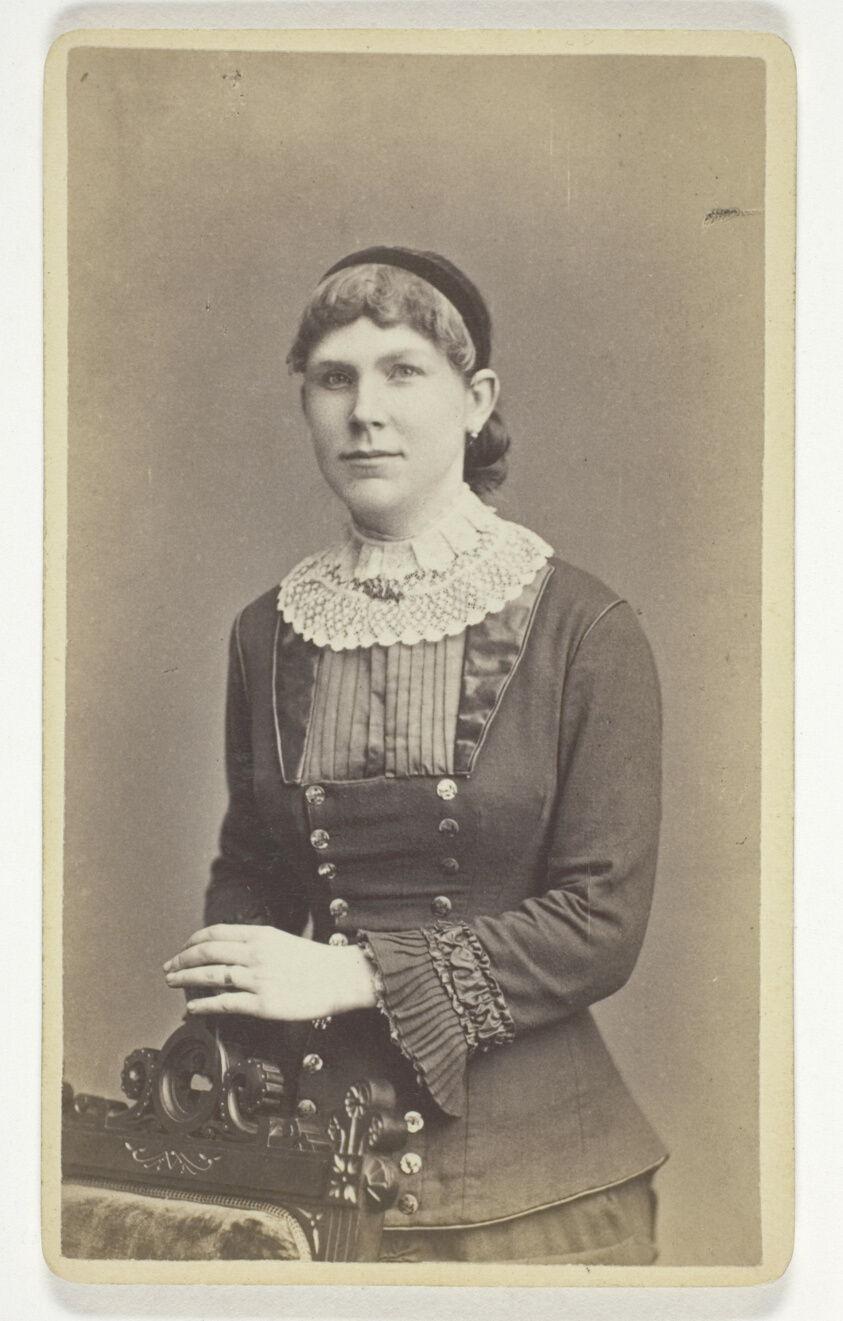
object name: Photograph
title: Untitled (Portrait of Seated Woman)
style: 19th century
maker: Lyman W. Colby (American, died 1900)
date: 1865/81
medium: Albumen print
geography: United States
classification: photography; photograph